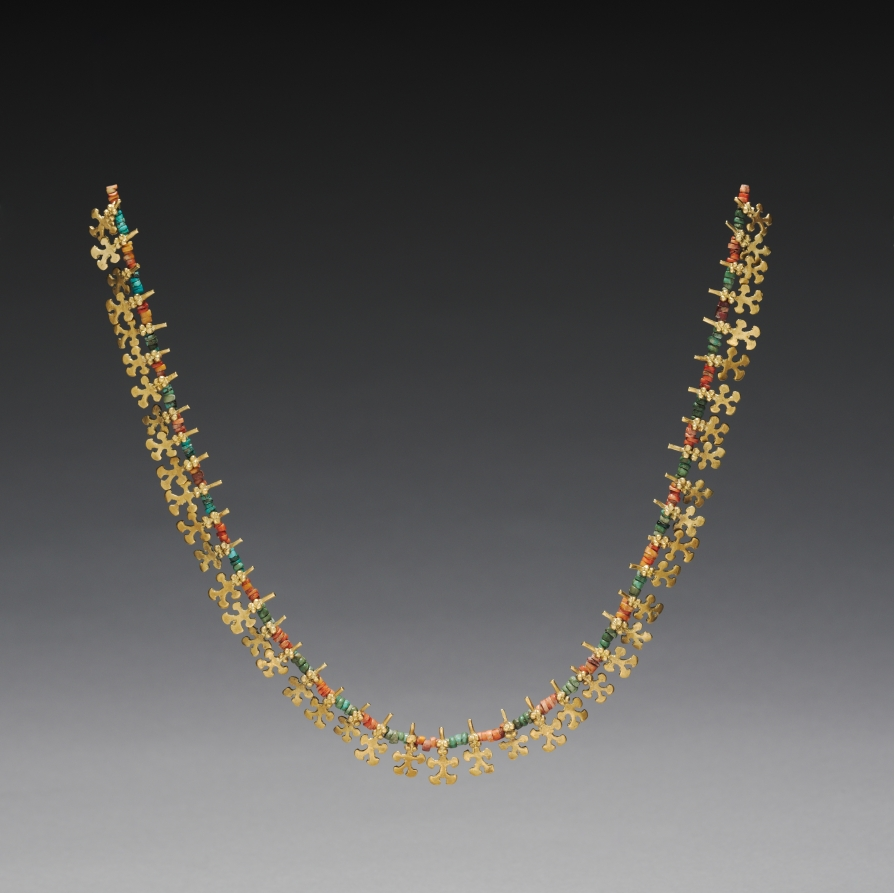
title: Necklace of Insect(?) Beads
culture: Colombia, Malagana region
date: 300 BCE–300 CE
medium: cast gold, turquoise, shell (modern stringing)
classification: Jewelry